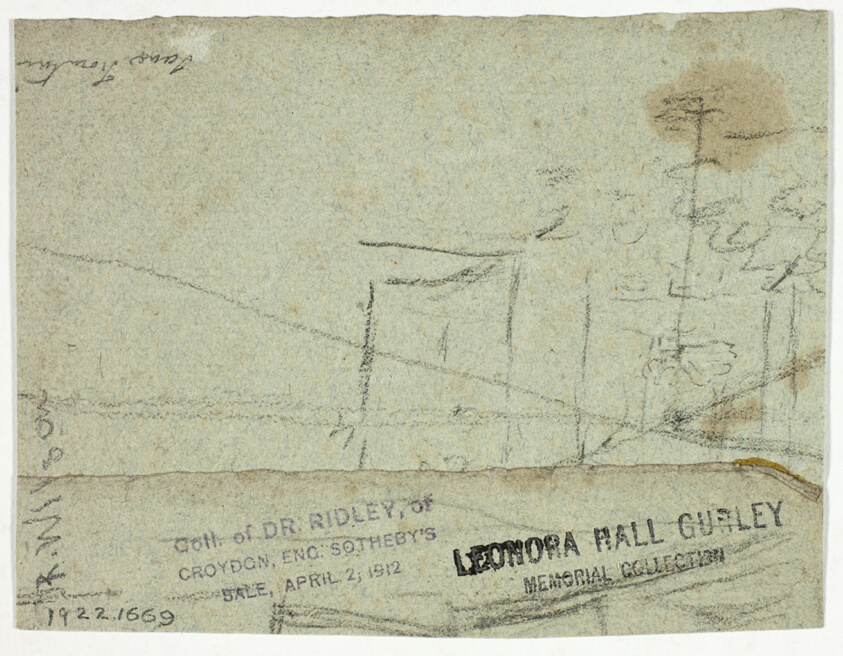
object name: Drawing and Watercolor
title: Sketch of Trees Near Bridge (recto); Sketch of Building (verso)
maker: Attributed to Richard Wilson; English, 1714-1782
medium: Charcoal and graphite (recto), and charcoal (verso), on blue laid paper, tipped onto cream wove paper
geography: England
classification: chalk; drawings (visual works); prints and drawing